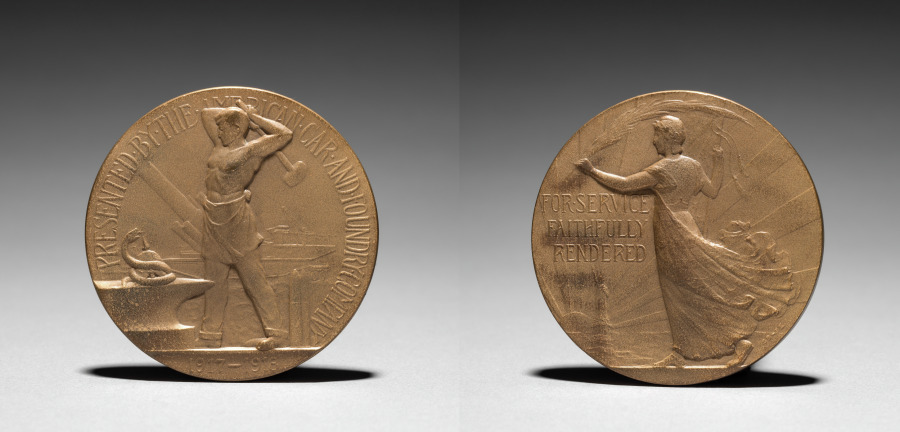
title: Honor Medal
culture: America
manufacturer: American Car and Foundry Co. (American)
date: 1917–1918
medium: bronze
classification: Metalwork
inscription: "For Service Faithfully Rendered"; signed: "C.B. - J.K."